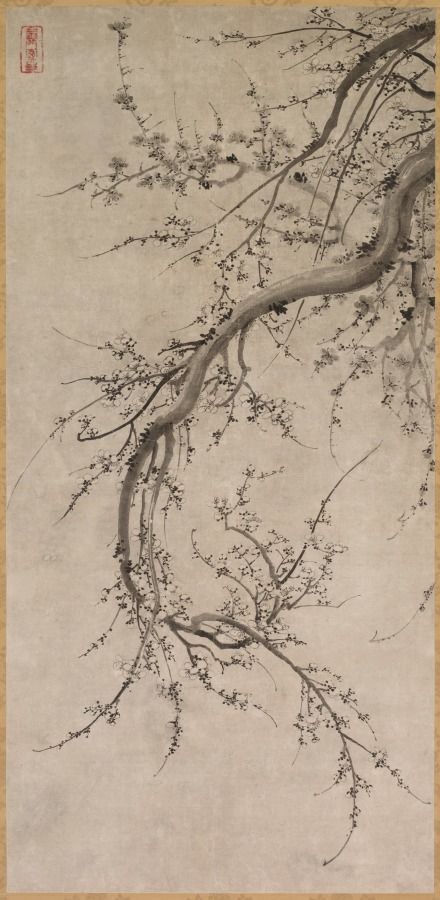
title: Prunus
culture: Japan, Edo period (1615–1868)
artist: attributed to Kano Einō (Japanese, 1631–1697)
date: mid- to late 1600s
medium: hanging scroll; ink on paper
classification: Painting